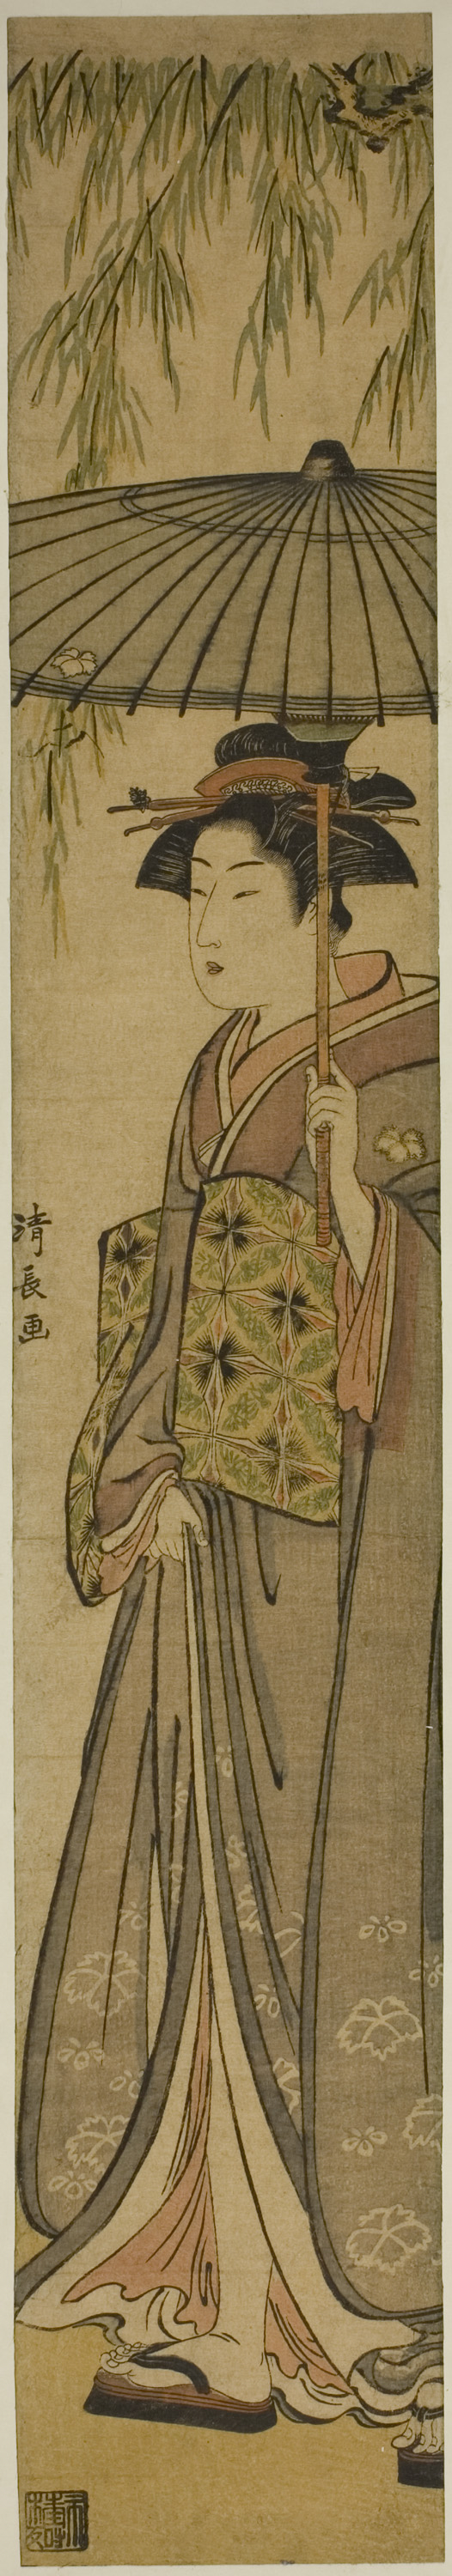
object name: Print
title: Geisha Carrying a Parasol under a Willow Tree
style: Japanese (culture or style)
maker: Torii Kiyonaga (Japanese, 1752-1815)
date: c. 1784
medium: Color woodblock print; hashira-e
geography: Japan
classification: woodblock print; print; asian art